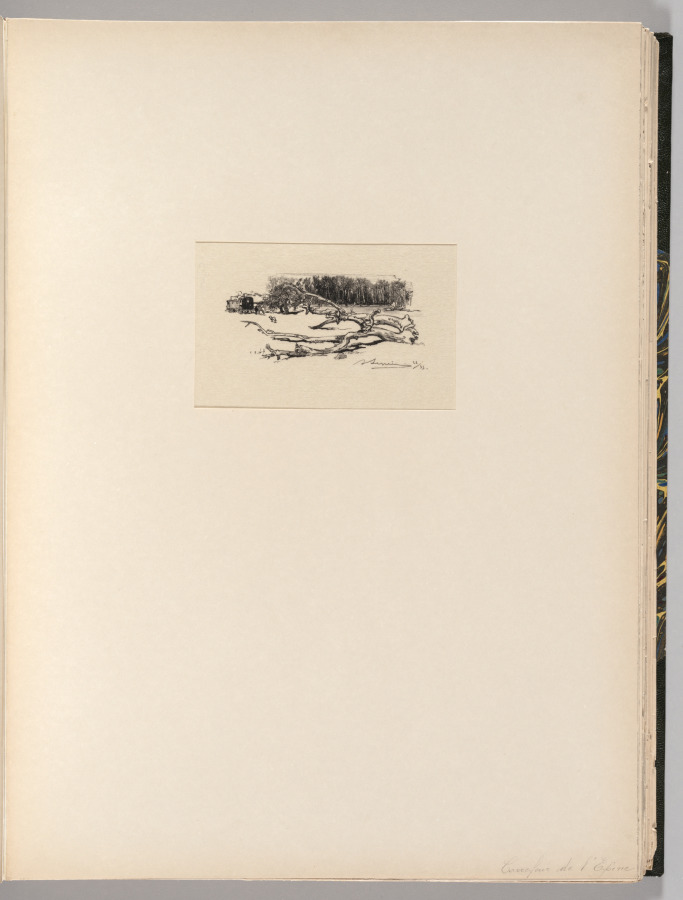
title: Fontainebleau Forest: Carrefour de l'Epine (La Forêt de Fontainebleau: Carrefour de l'Epine)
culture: France, 19th century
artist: Auguste Louis Lepère (French, 1849–1918)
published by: A. Desmoulins, Published in Revue Illustrée, 1887–90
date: 1890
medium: wood engraving from bound volume of 34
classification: Bound Volume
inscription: In block, lower left: e a. H.A; below image, lower right, in black ink: ALepère 22/35; on window mat, lower right, in graphite: Carrefour de l'Epine Image: 4.5 x 10.3 cm; sheet: the print in encapsulated in a tipped-in window mat preventing the sheet from being measured